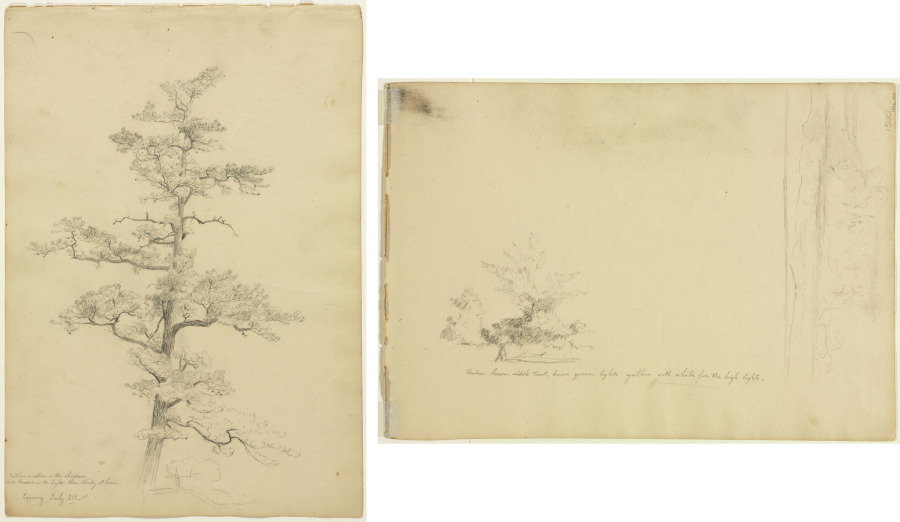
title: Pine Tree, Conway, New Hampshire (recto); Landscape and Tree Studies (verso)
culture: America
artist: David Johnson (American, 1827–1908)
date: c. 1851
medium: graphite with pen and brown ink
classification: Drawing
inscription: recto: by artist, in graphite, ll: toutches. [sic] smaller in the shadows. / and broader in the lights. than study at home. / Conway July 21s [fragmentally underlined] verso: by artist, in graphite, across bottom: shadow. brown, middle tient, brown green. lights yellow. with white for the high lights. [partially underlined] ; by unkown hand, lower right, in graphite: 1500 ; by different unknown hand, lower right, in graphite: 120 [partially erased)